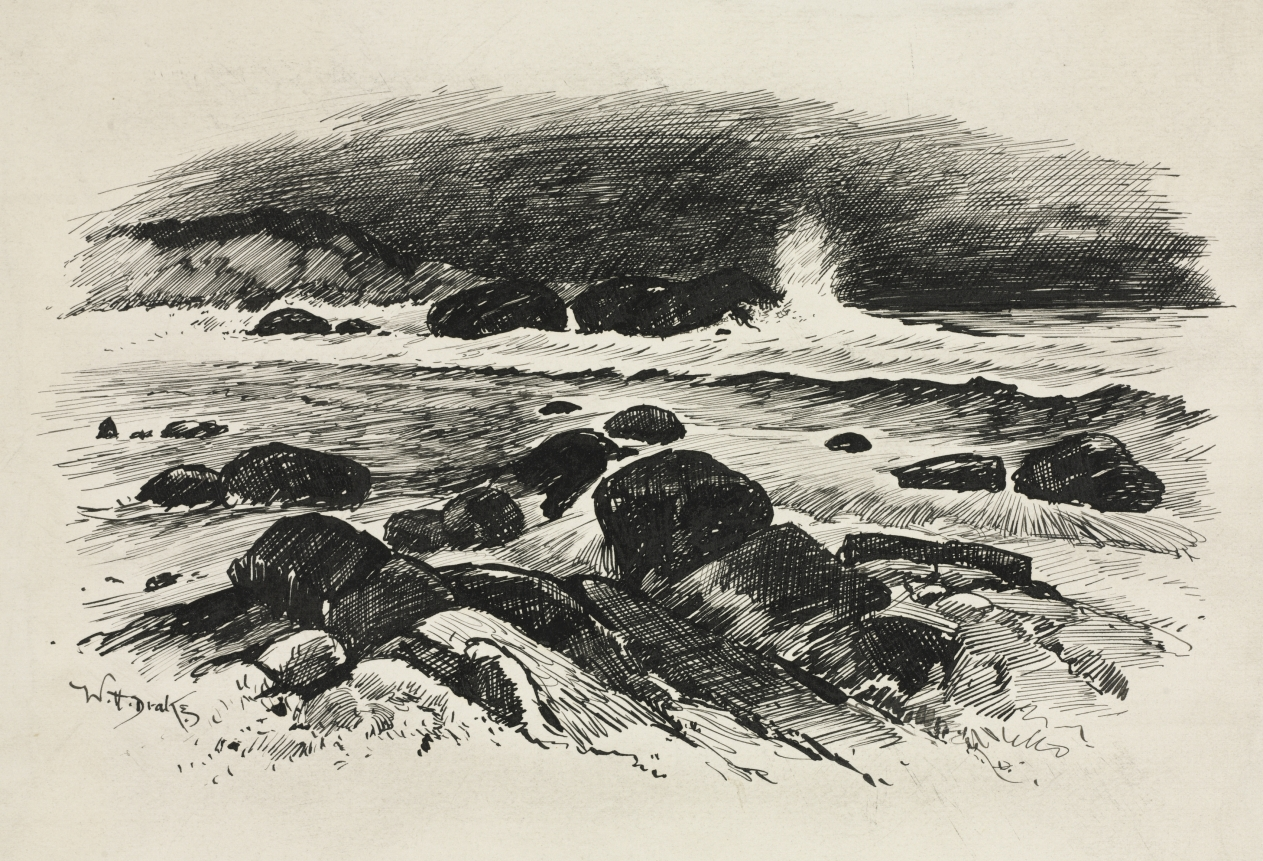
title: Tail Piece for Chapter XII from "Lorna Doone"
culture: America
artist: William Henry Drake (American, 1856–1926)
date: c. 1889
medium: pen and ink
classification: Drawing